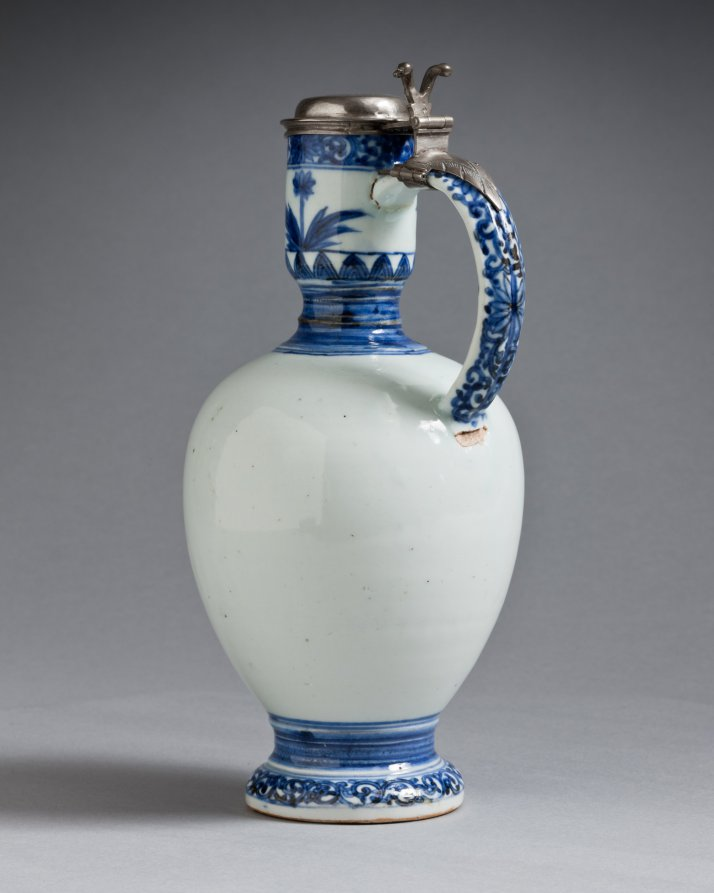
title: Jug with Silver Mounts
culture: Japan, Edo period (1615–1868)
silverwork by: Barent van Leeuwen (Dutch, 1637–1682)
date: c. 1662–76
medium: porcelain with underglaze blue decoration and silver mounts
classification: Ceramic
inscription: [on silver]: town mark for Amsterdam; lion rampant crowned (alloy mark for 0-934 silver); d (date letter for 1666), maker's mark of Barent van Leeuwen.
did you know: The coat of arms on this jug are those of the Valckenier family, active in the Dutch East India Company.